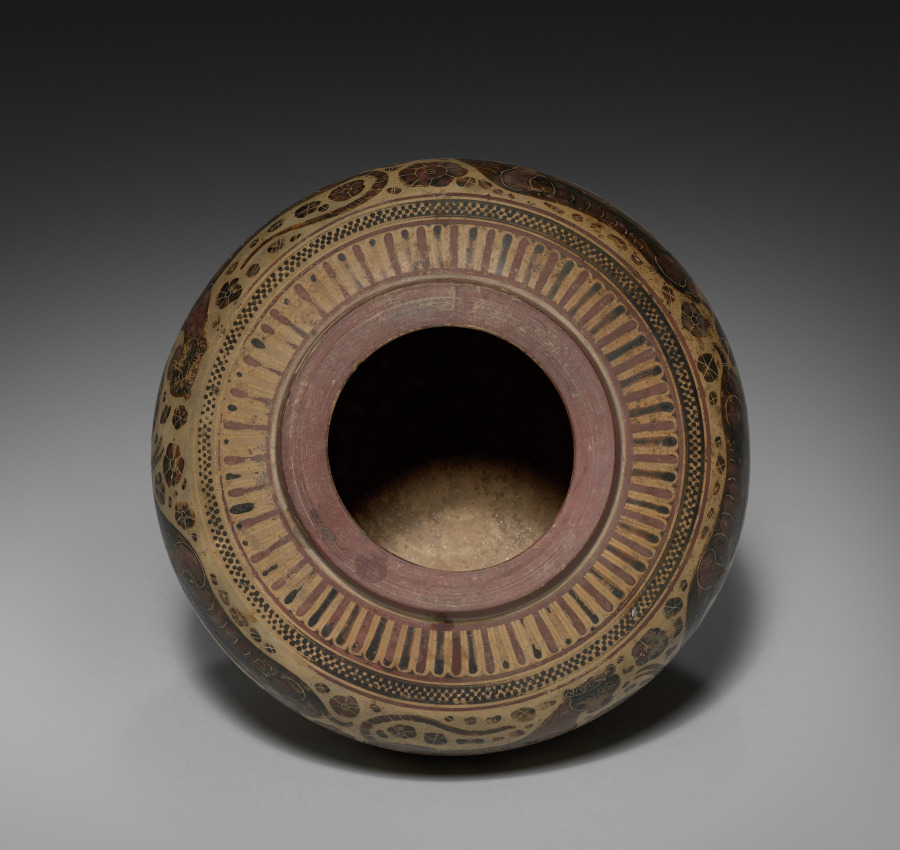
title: Corinthian Vase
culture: Greece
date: 600s BCE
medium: earthenware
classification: Ceramic